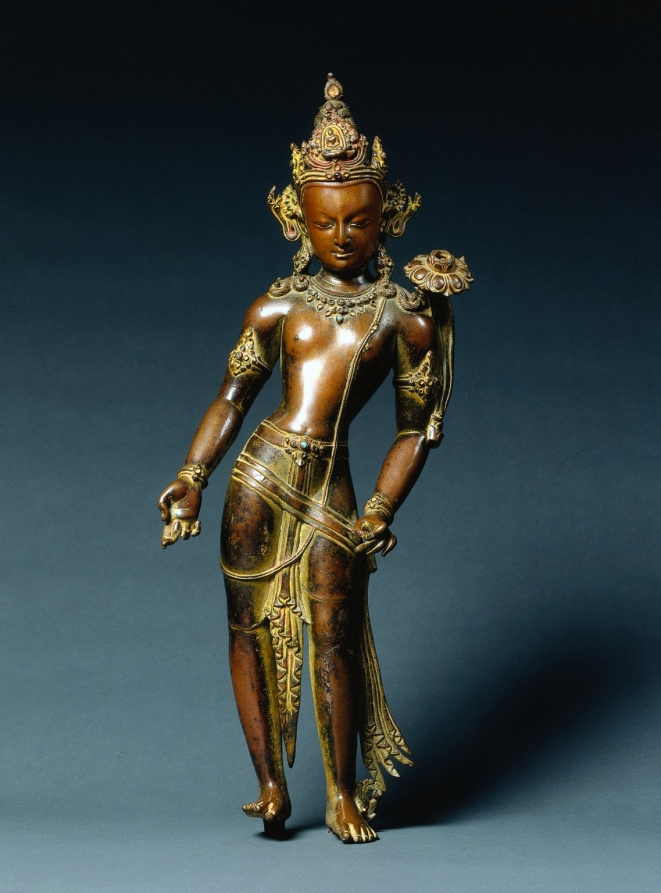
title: Avalokitesvara Padmapani: Bodhisattva of Mercy Bearing a Lotus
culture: Nepal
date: c. 1000s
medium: bronze with gilding, pigment, and semiprecious stones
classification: Sculpture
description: Venerated by Buddhists across the world as the perfect embodiment of compassion for all beings, this bodhisattva-a being only one stage away from complete enlightenment-holds his right hand out gently in the gesture of gift-giving. In his left hand, he once grasped the stem of a lotus flower that blossoms over his left shoulder, indicative of the abundant benefits that result from acts of loving kindness. All bodhisattvas wear royal garments and jewels, in reference to the historical Buddha’s early life as a prince, prior to his achievement of enlightenment through meditations in the forest. In the center of his crown is the tiny seated image of the meditating Buddha Amitabha that identifies this figure as Avalokitesvara specifically. Nepalese bronzes of the 11th century are solid cast and have an exceptionally high copper content in the alloy that makes the bronze difficult to manage during fabrication. The color achieved by the extra copper creates a distinctive warmth and softness in the sculpture. The flexed toes of the right foot and the swinging to one side of the gathered ends of his garment impart a sense of dynamism to his ongoing act of giving. His facial expression is sweet and placid but sharp, as though he is keenly aware of the sufferings of the world.